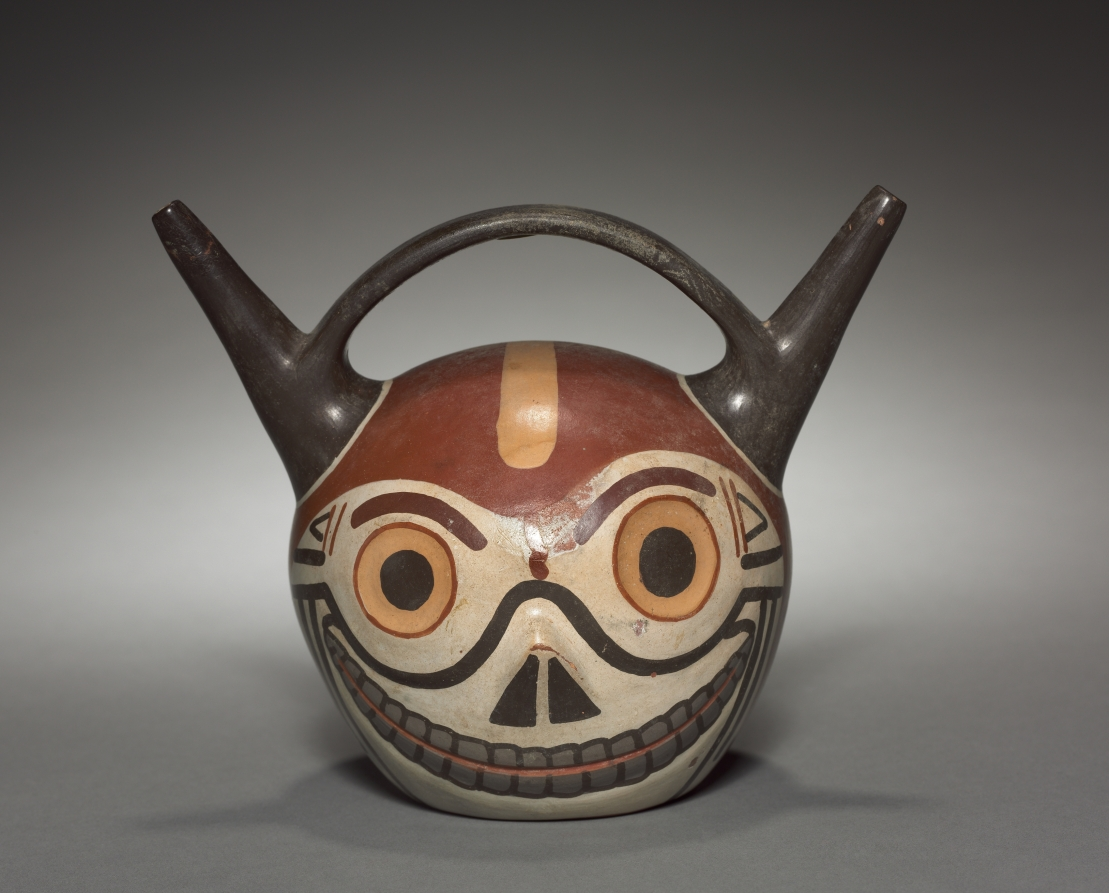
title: Skull Vessel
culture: Wari (Pachacamac) style, Middle Horizon, Epoch 2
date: 500–900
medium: earthenware with colored slips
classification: Ceramic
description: This vessel's clear, vibrant color reveals the inspiration of Wari ceramics in those of the South Coast Nasca. The twin spouts joined by a flat, handle-like bridge are also an old South Coast spout type.